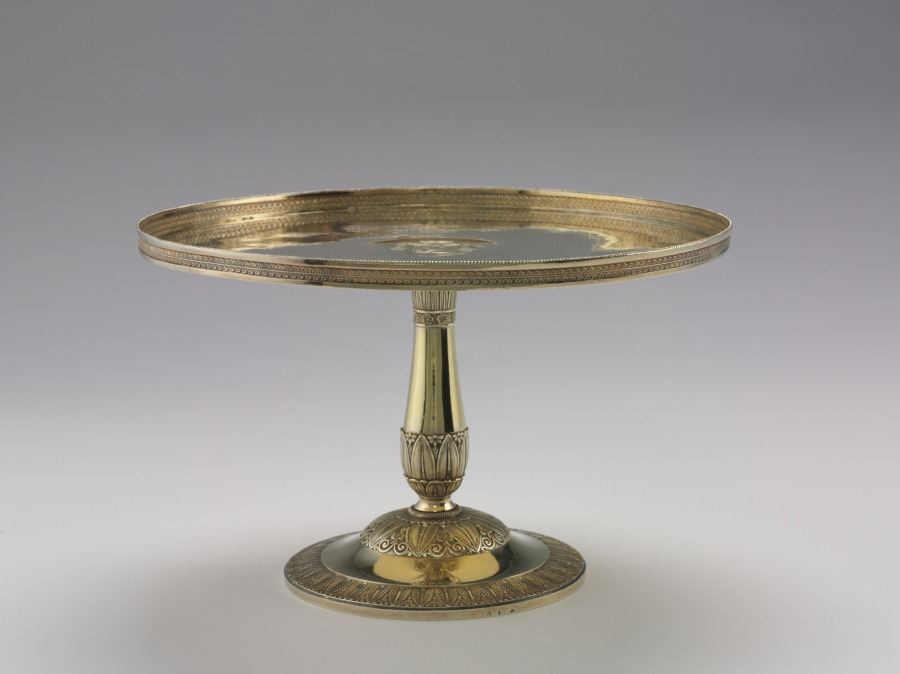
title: Pair of Tazza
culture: Italy, Rome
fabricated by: Pietro Paolo Spagna (Italian, 1793–1861)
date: c. 1815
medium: silver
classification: Silver